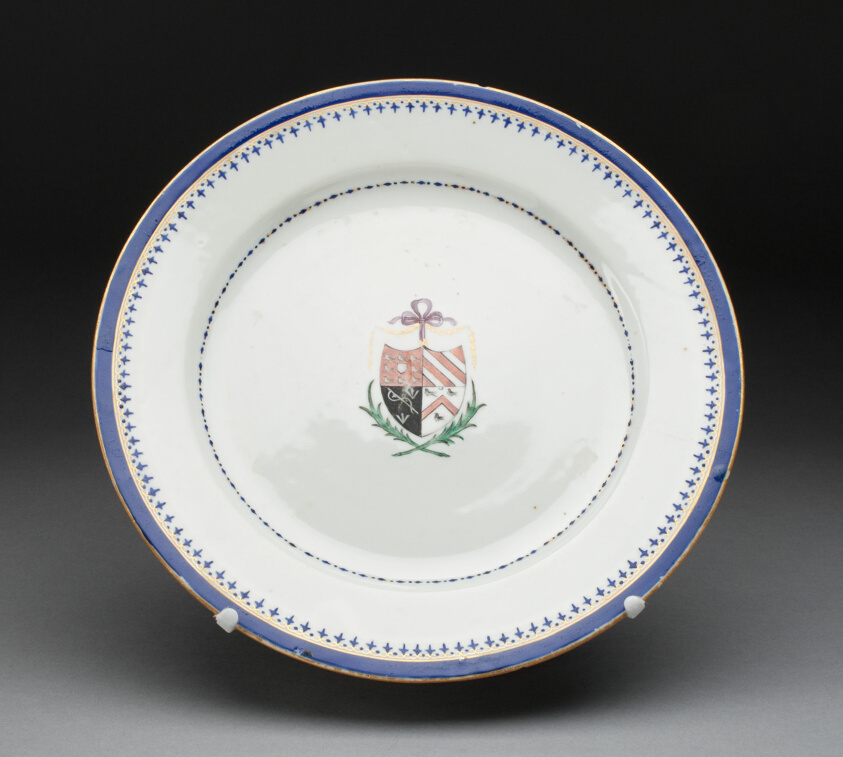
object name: Ceramics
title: Plate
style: chinese export, Chinese (culture or style), East Asian, asian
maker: China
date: 1791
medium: Hard-paste porcelain with polychrome enamels and gilding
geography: China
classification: plate (general, dish); dish (vessel); chinese export porcelain; ceramics; porcelain; european decorative arts